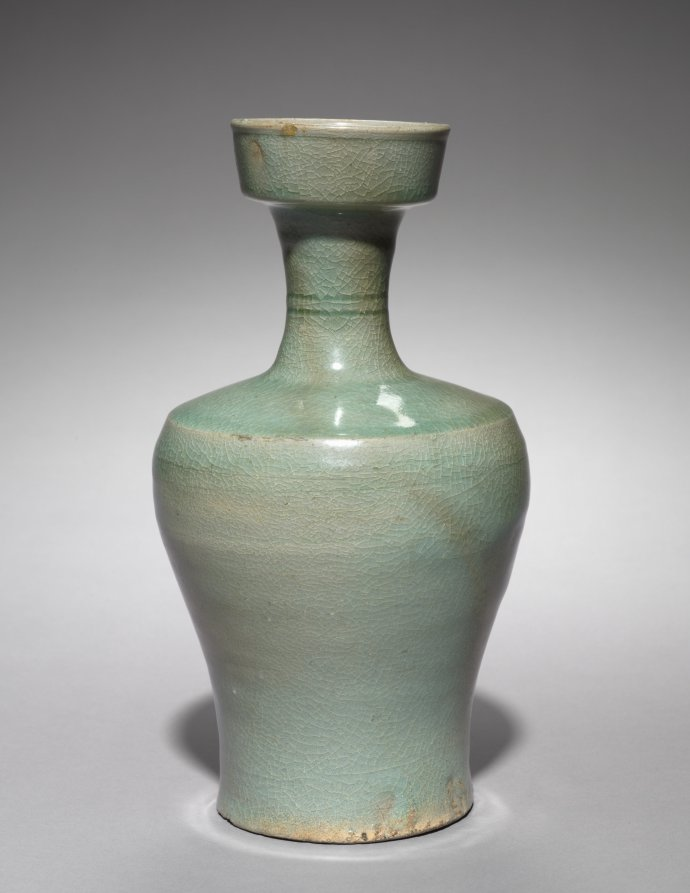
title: Wide-mouthed Bottle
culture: Korea, Goryeo dynasty (918–1392)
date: 1100s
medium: celadon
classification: Ceramic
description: As early as the seventh century, the practice of drinking tea and wine became an important part of elite culture in Korea. Elites of the Goryeo period commissioned a variety of types of utensils and vessels including this handsome wine bottle, to make their drinking experience more exciting.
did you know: The distinctive bluish and greenish glaze of Goryeo celadons, shown in this bottle, is the result of distinctive small and long Korean kilns, which maintained a low oxygen saturation with a high level of carbon dioxide.